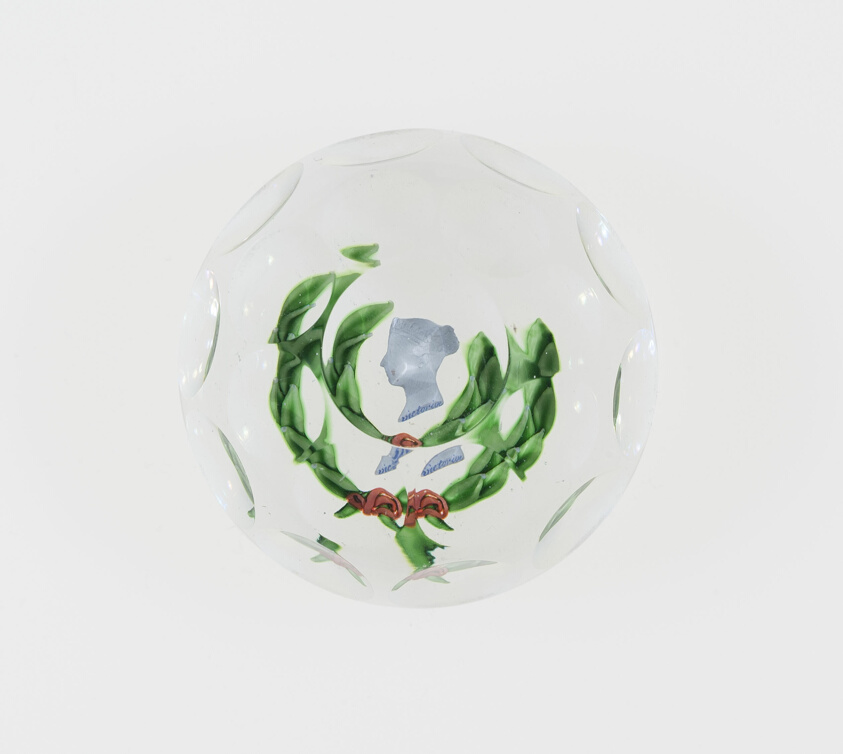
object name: Glass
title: Paperweight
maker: Saint-Louis Glassworks (Cristalleries de Saint-Louis); Lorraine, France, founded 1586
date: c. 1846–55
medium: Glass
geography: Saint-Louis-lès-Bitche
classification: paperweight; sulphide (glass); european decorative arts; glass